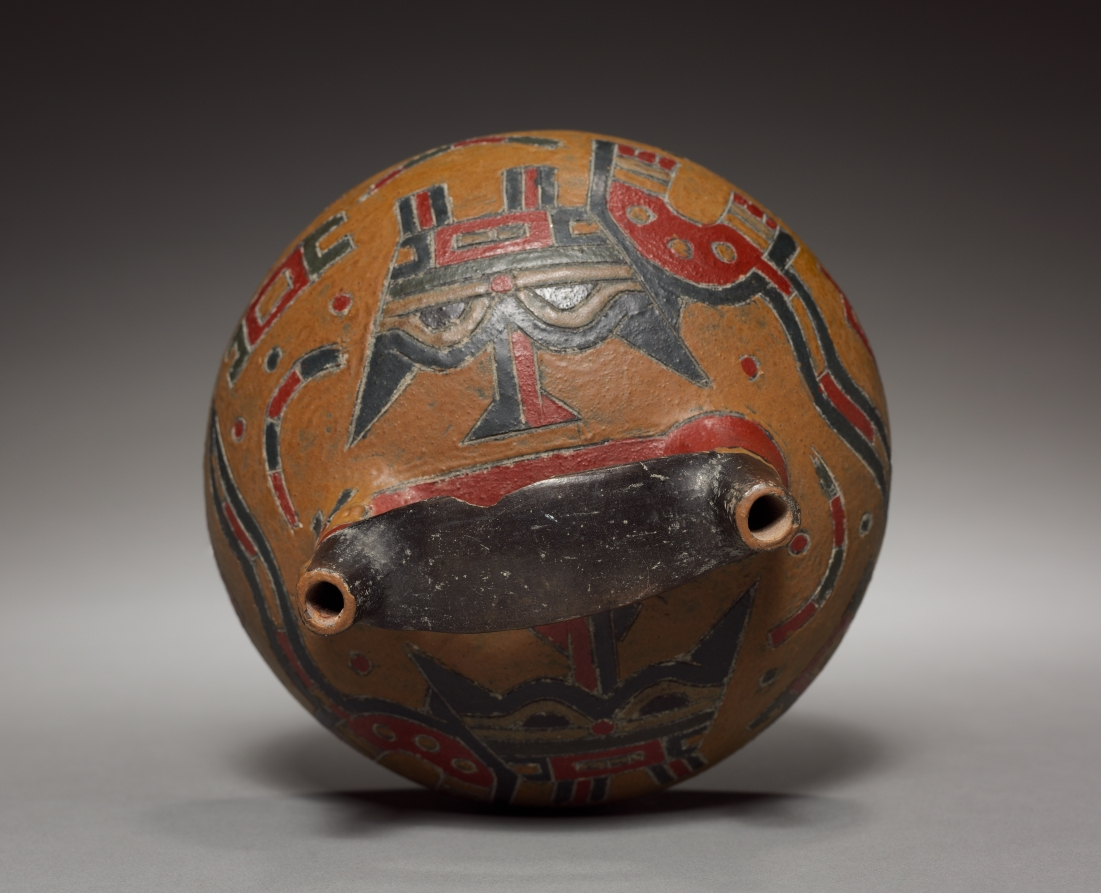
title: Vessel with Feline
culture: Peru, South Coast, Paracas (Cavernas) style (700 BCE–1 CE)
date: 700 BCE–1 CE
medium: earthenware, resin-based paint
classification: Ceramic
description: Little is known of the meaning of the beautifully abstracted felines so often incised on Paracas ceramics. The designs achieve much of their complexity through color applied as resin-based paint after the vessel was fired in a smoky atmosphere that blackened its surface. Two spouts joined by a bridge appear on many fine South Coast ceramics. The form probably had meaning, now lost.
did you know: Small, wild, reclusive felines, pampas cats live on the margins of agricultural fields, where they prey on rodents and other pests that are a farmer’s bane